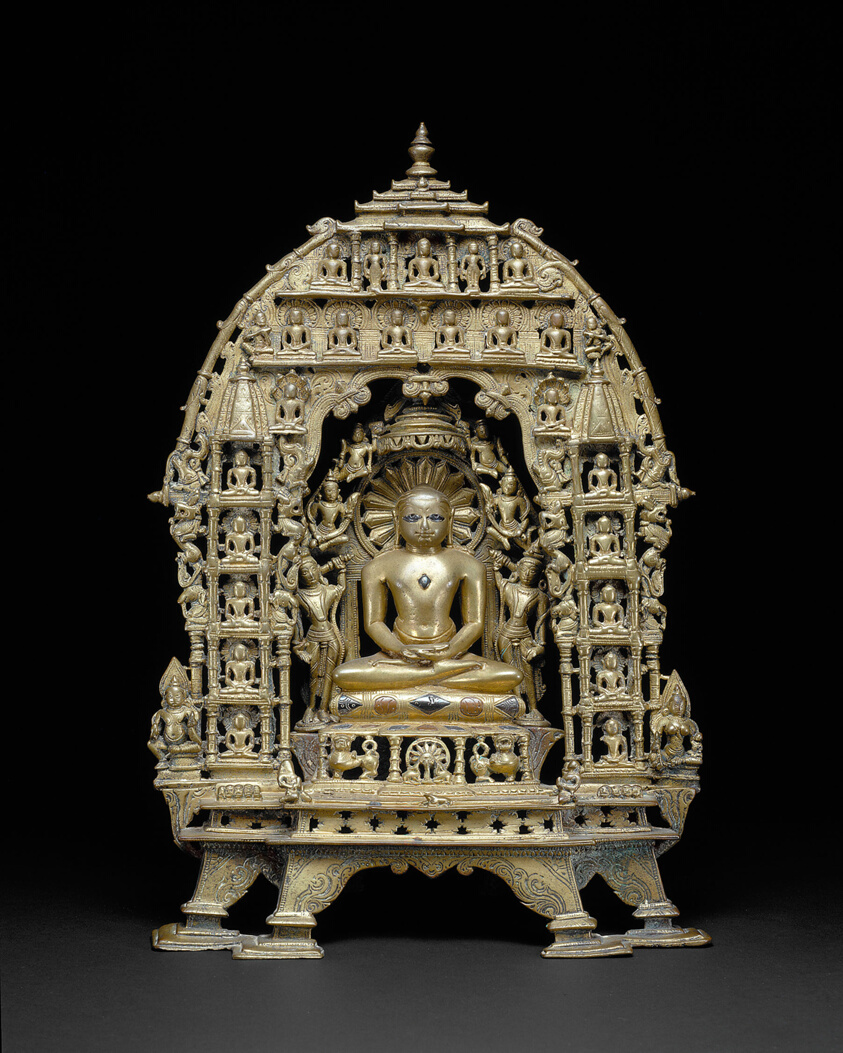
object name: Sculpture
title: Altarpiece with the First Jaina Tirthankara Rishabhanatha Surrounded by Twenty-Three Other Tirthankaras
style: South Asian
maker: India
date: 1089 A.D.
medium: Brass inlaid with copper and silver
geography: India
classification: brass; metalwork; asian art; sculpture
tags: Jain, gods (deities), religion, Jaina, Jainism